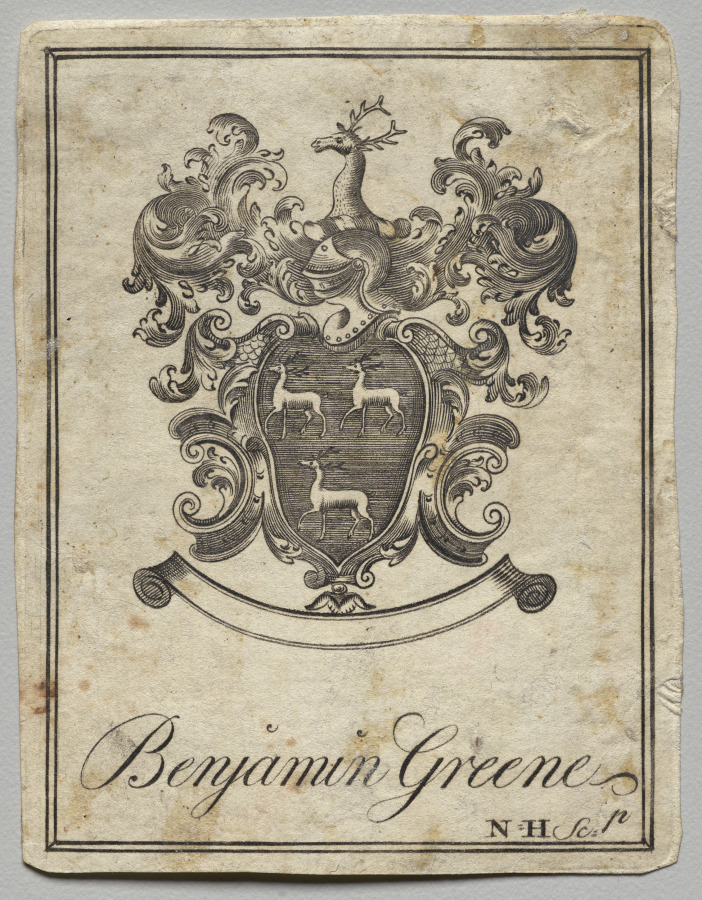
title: Bookplate: Coat of Arms with Benjamin Greene inscribed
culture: America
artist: Nathaniel Hurd (American, 1730–1778)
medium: engraving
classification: Print